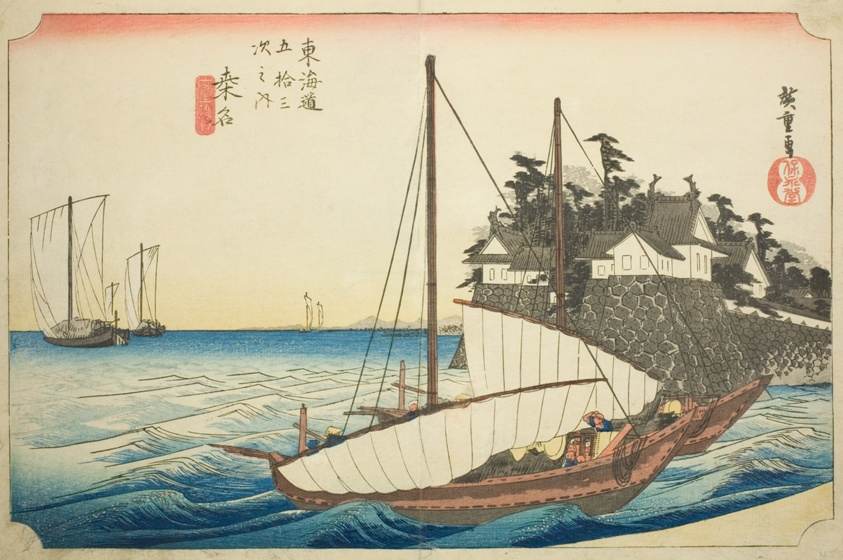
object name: Print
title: Kuwana: The Landing of the Shichiri Ferry Crossing (Kuwana, Shichiri watashiguchi), from the series "Fifty-three Stations of the Tokaido (Tokaido gojusan tsugi no uchi)," also known as the Hoeido Tokaido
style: Japanese (culture or style)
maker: Utagawa Hiroshige 歌川 広重; Japanese, 1797-1858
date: c. 1833/34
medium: Color woodblock print; oban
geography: Japan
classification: woodblock print; print; asian art